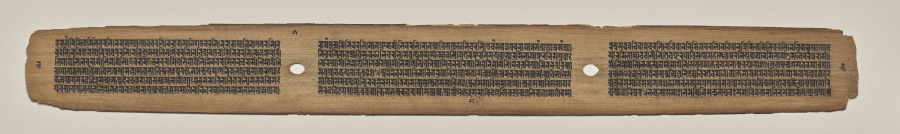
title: Text, Folio 5 (verso), from a Manuscript of the Perfection of Wisdom in Eight Thousand Lines (Ashtasahasrika Prajnaparamita-sutra)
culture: Eastern India, Bihar, Vikramashila Monastery. Painting: Nepal, Kathmandu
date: Sunday, September 14, 1119 (year 239 of the Newar Samvat in the month of Ashvina)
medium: gum tempera and ink on palm leaf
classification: Painting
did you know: Page numbers are listed twice, above and to the left of the text, using two systems.